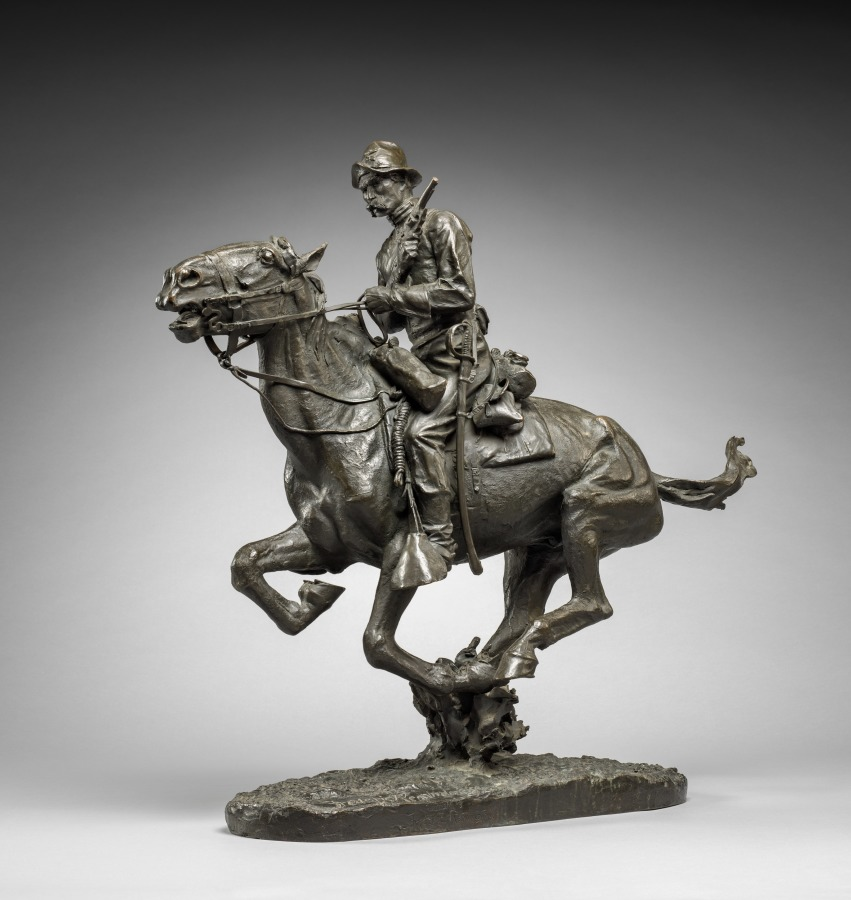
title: Trooper of the Plains-1868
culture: America, early 20th Century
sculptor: Frederic Remington (American, 1861–1909)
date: modeled 1908, cast c. 1911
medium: bronze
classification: Sculpture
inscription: Signed on top of base: Frederic Remington; Inscribed on side of base: Copyright by Frederick Remington, Roman Bronze Works, N.Y.; numbered underneath base: 3